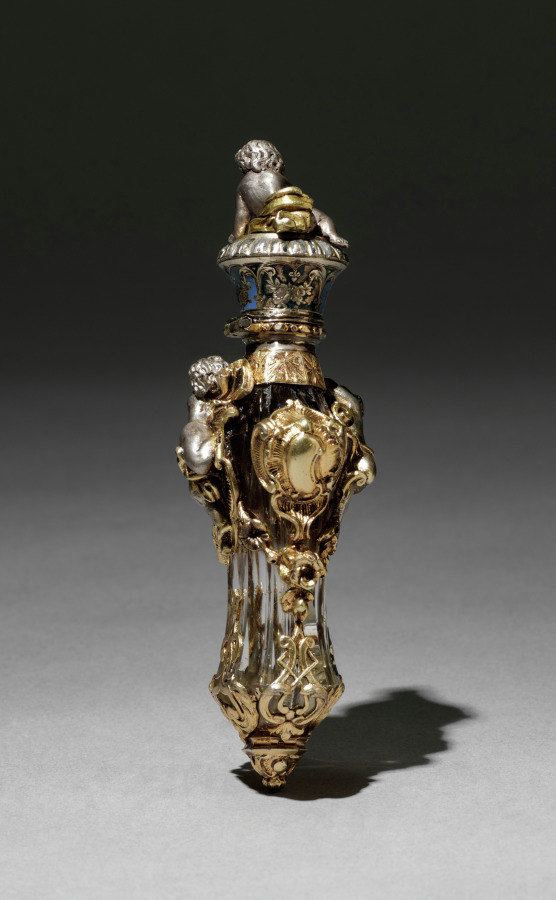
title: Scent Bottle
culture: France, 19th century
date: 1850–1870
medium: glass with enameled silver mounts, partially gilt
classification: Miscellaneous